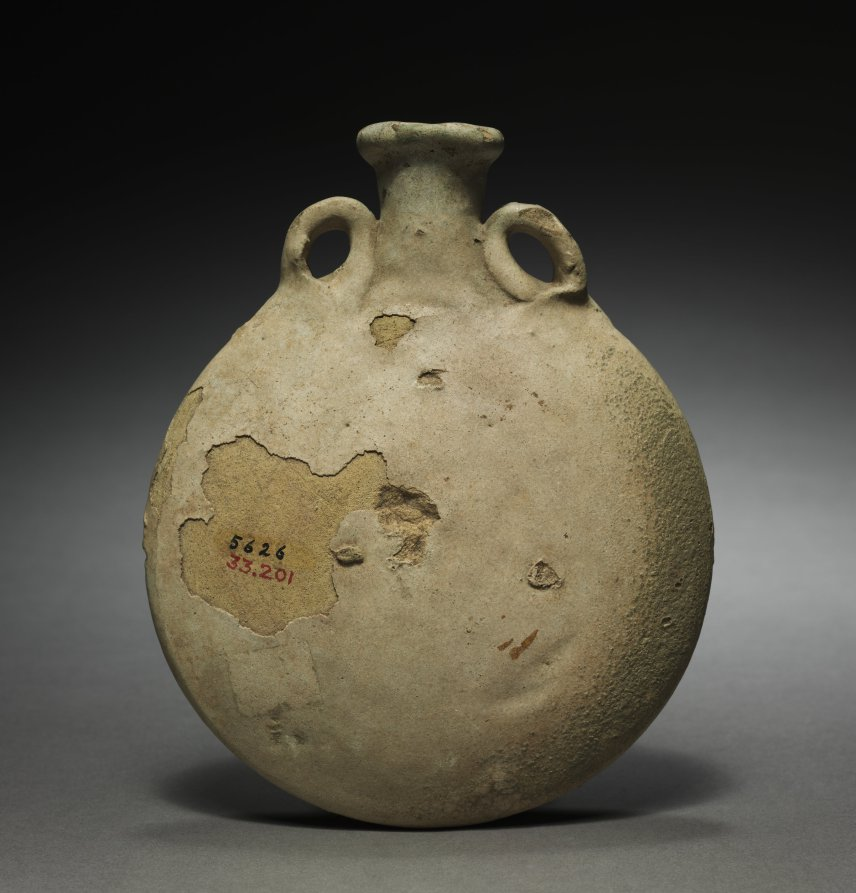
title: Pilgrim Flask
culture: Parthian Empire (247 BCE–224 CE)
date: 1–200 CE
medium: terracotta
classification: Ceramic